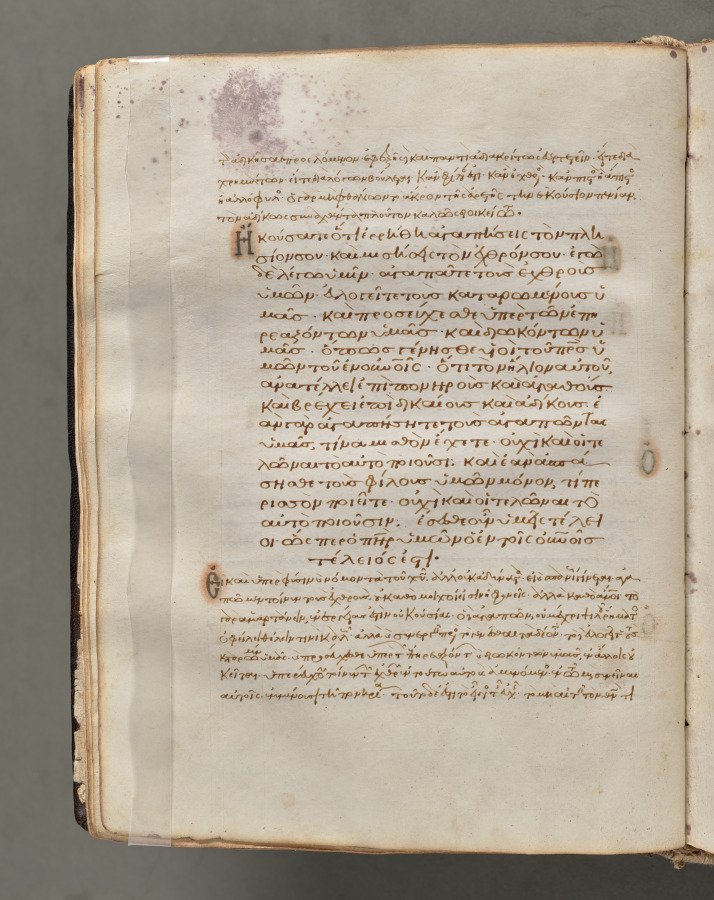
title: Text, folio 23 (verso), from a Gospel Book with Commentaries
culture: Byzantium, Constantinople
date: c. 1000–1100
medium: ink, tempera, and gold on vellum; leather binding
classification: Bound Volume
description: Each of the four gospels in this book opens on a page with brilliantly illuminated borders depicting the author of the text as well as birds-principally peacocks, symbols of the immortality of the soul-and fountains, representing the fountain of life and the salvation of the soul. This volume consists of 428 leaves with texts in Greek. Its level of sophistication suggests that it was probably written and decorated in a monastery in Constantinople.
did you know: Gospel Books were carried in procession through Byzantine churches.